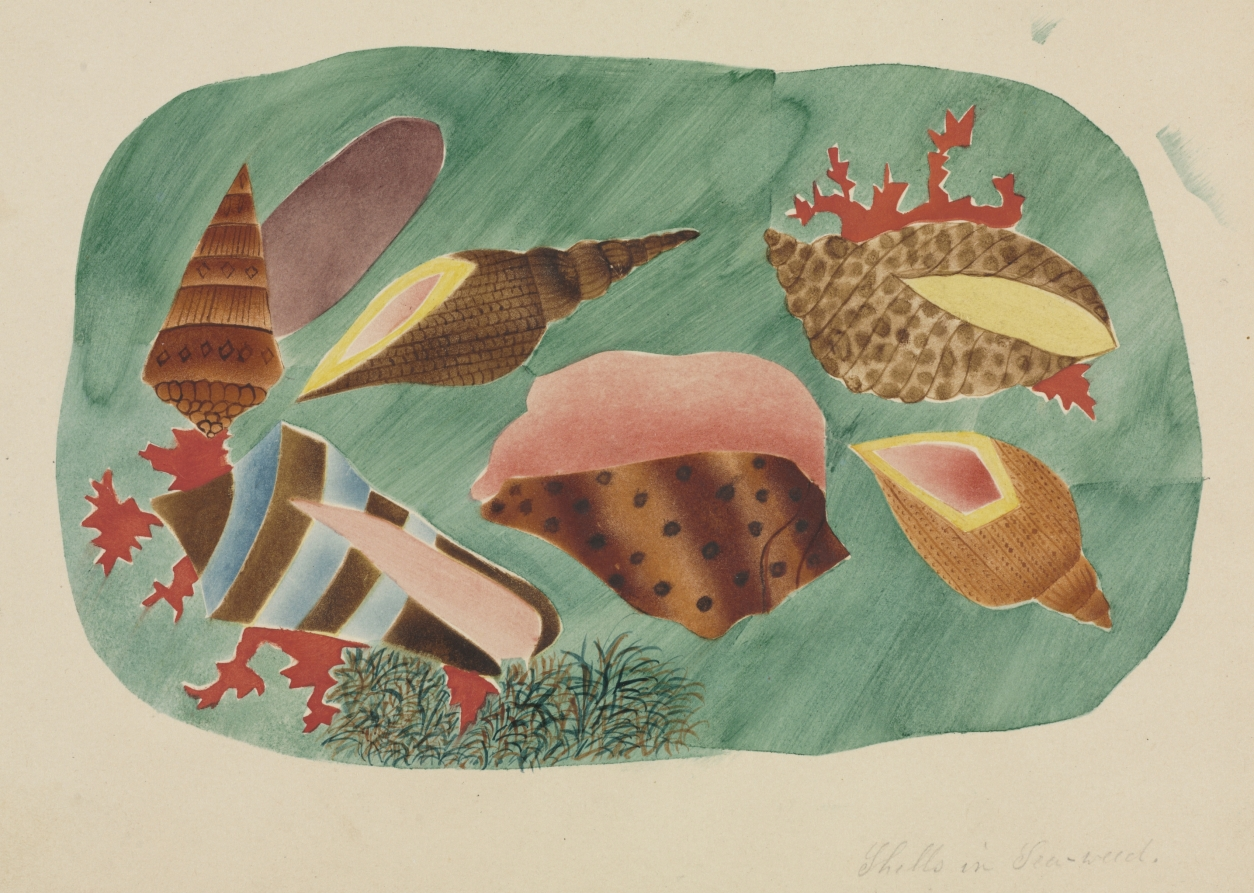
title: Shells in Seaweed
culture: America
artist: Mary Altha Nims (American, 1817–1907)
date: 1800s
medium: watercolor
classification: Drawing